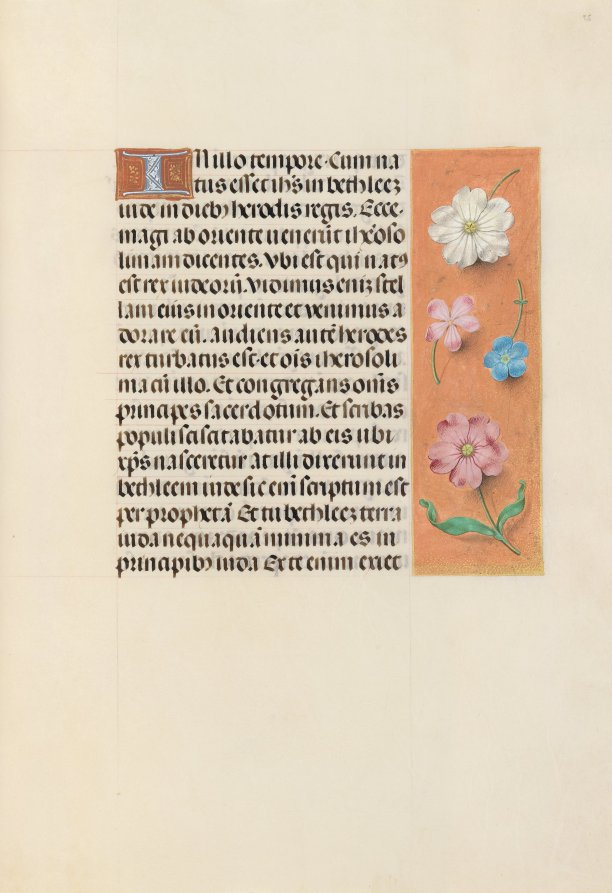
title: Hours of Queen Isabella the Catholic, Queen of Spain: Fol. 95r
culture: Flanders, Ghent and Bruges, late 15th century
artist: Master of the First Prayerbook of Maximillian (Flemish, c. 1444–1519)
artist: and Associates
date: c. 1500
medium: ink, tempera, and gold on vellum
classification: Bound Volume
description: This manuscript was illuminated by a circle of at least five highly organized manuscript painters active in the Flemish cities of Ghent and Bruges. The principal illuminator was Alexander Bening, who painted the majority of the book's miniatures. Manuscripts produced by this circle of artists are renowned for the decoration of their borders, which typically feature a rich variety of realistically-painted flowers, birds, and butterflies. This prayer book, called a book of hours, was intended not for a cleric, but for the private devotions of a lay person-in this case, Isabella the Catholic, Queen of Spain (1451-1504). Isabella's coat of arms embellishes the book's frontispiece. It is unlikely that the book was commissioned by the Queen herself; rather, she probably received it as a diplomatic gift from someone courting her patronage, perhaps Cardinal Francisco Jimenez de Cisneros. A Franciscan friar, Jimenez was dependent upon Isabella for his advancement, first to the post of Queen's confessor in 1492, and then to Archbishop of Toledo in 1495.